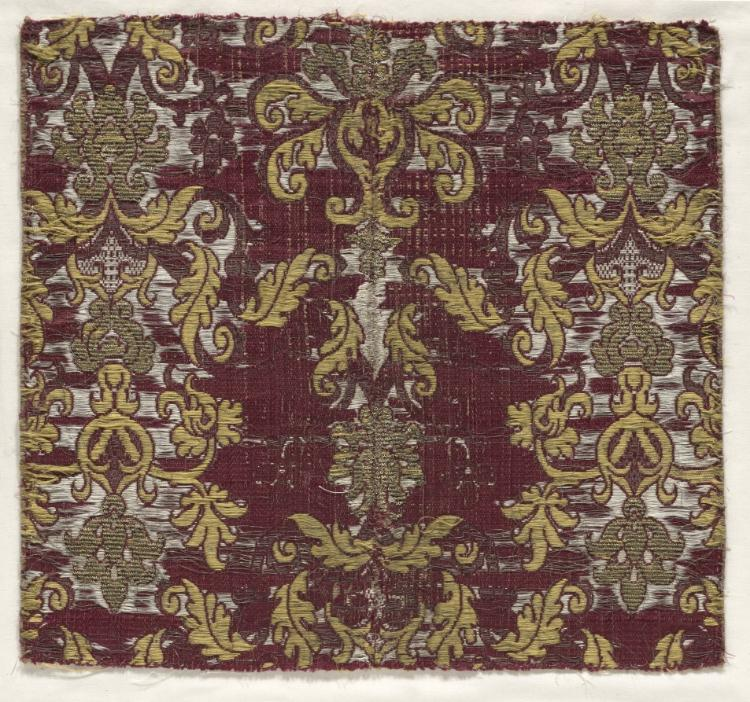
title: Brocatille Textile Fragment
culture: Spain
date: 1500s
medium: silk, metallic thread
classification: Textile